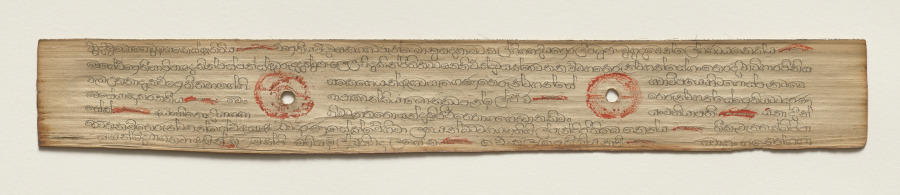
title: Leaf from a Buddhist Manuscript (verso)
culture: Sri Lanka, Singhalese, Late 17th century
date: c. 1700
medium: fiber paper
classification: Manuscript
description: Palm leaf material is still used for manuscripts in Sri Lanka. The palm leaves are prepared first by boiling them, drying them in the sun, and then rubbing them with oils. Scribes then use a metal stylus to incise the text. Then charcoal powder is wiped across the pages, filling in only the inscribed lines.